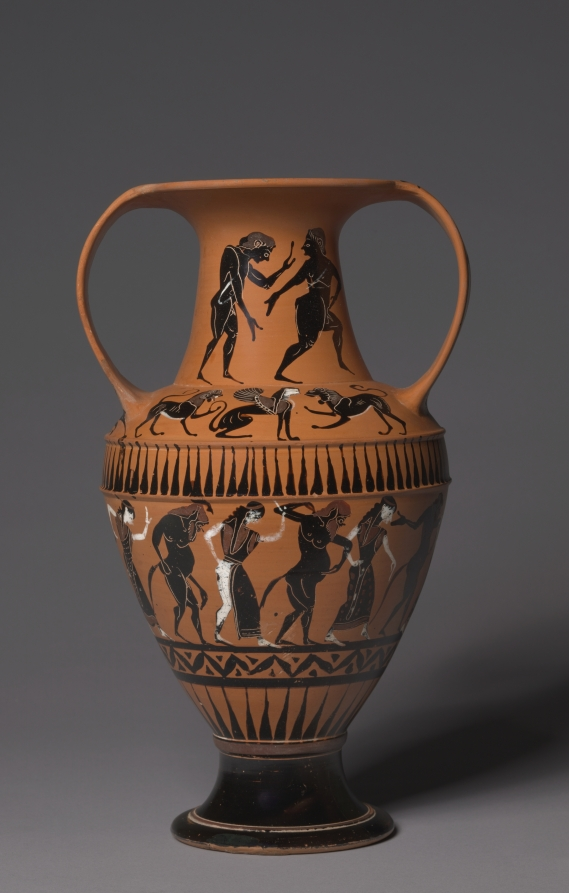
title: Black-Figure Nikosthenic Amphora (Storage Vessel): Dancing Youths; Sphinxes and Lions; Satyrs and Maenads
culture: Greek, Attic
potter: signed by Nikosthenes (Greek, Attic, active c. 545–510 BCE)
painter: attributed to Painter N, Thiasos Group (Greek, c. 530–510 BC)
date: c. 530–510 BCE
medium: ceramic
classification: Ceramic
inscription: inscription Under handle A/B:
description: The distinctive shape of this amphora—wide strap handles, conical neck, and ribs running around the upper body—is a trademark of the potter Nikosthenes, who signed his name below the partially restored handle (together with the verb EPOIESEN, for “made”). Nikosthenes signed nearly 150 surviving vases, more than any other named potter or vase-painter. Made in Athens with an Etruscan clientele in mind, Nikosthenic amphorae emulate precious metal and ceramic bucchero vases made in Etruria (central Italy), where many examples have been discovered. The painted figures include dancing youths (on the neck), sphinxes between lions (on the shoulder), and a continuous procession of dancing satyrs alternating with women (on the body).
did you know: The painter of this vase decorated nearly every available surface; the undecorated handle section is modern.